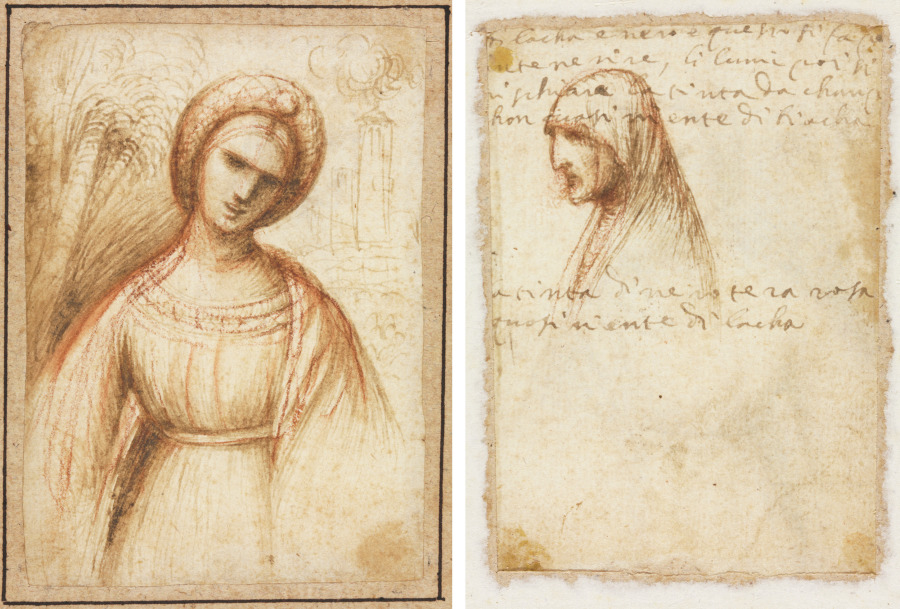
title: Lady in a Landscape (recto); Bust-Length Profile of an Old Woman (verso)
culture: Italy, Ferrarese, 16th century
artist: possibly by Dosso Dossi (Italian, c. 1490–after 1541)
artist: Giuseppe Caletti (Italian, 1590-1670)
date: c. 1630–60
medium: brush and brown wash and red chalk (extended with brush and water in places)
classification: Drawing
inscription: recto: SECONDARY SUPPORT, lower center, in graphite: F[ran?] Francia verso: across top and center, in brown ink: si lacha e nero e questo si fa [illegible] / inte nerire, ci lumi poi si / rischiara la tinta da cham[illegible] / hon quasi niente di R[a?]ch[i?] / [l?]a tinta di nero [se?]ra rosa / quo[illegible] niente di lacha